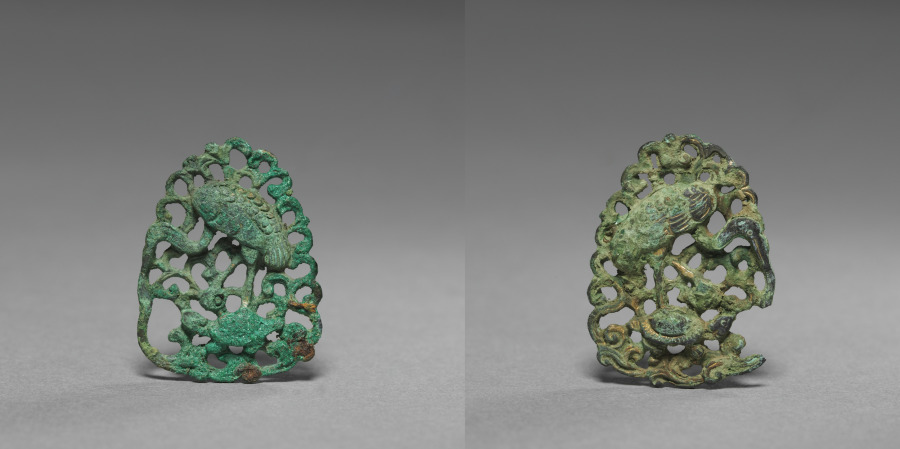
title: Ornaments with Heron and Turtle Design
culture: Korea, Goryeo dynasty (918–1392)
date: 1100s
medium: bronze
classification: Metalwork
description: Metalworking techniques advanced remarkably during the Goryeo period (918–1392). Sophisticated metal objects with intricate designs were used not only as daily accessories, but also as burial goods for commemorating the dead. Traces of fibers found on the backs of these metal ornaments suggest that they were once used as brooches to hold garments together.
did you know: This metal ornament is part of a decorative brooch once used to hold clothes together.